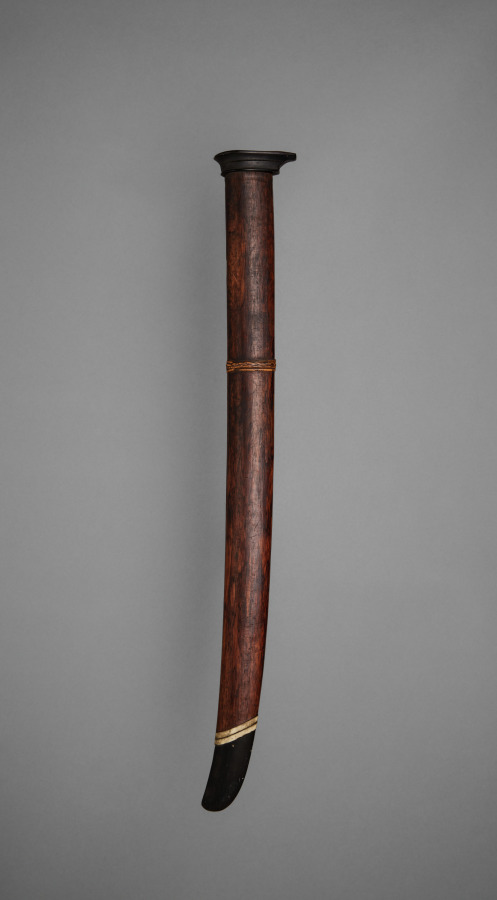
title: Scabbard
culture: Indonesia, Sulawesi (Celebes)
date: Before 1918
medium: metal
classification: Arms and Armor